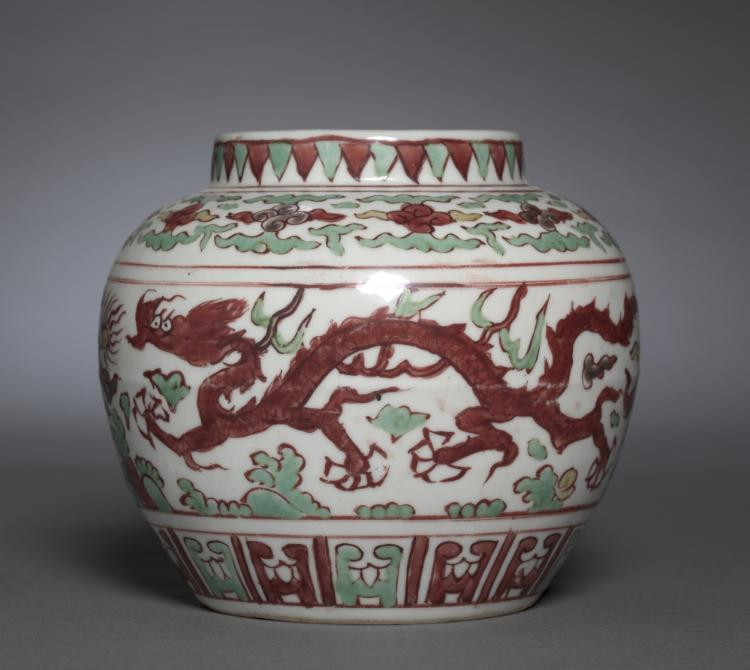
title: Jar with Dragons Pursuing Flaming Jewels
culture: China, Jiangxi province, Jingdezhen kilns, Ming dynasty (1368-1644), Jiajing mark and reign (1522-66)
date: 1522–66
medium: procelain with wucai (five color) overglaze enamel decoration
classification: Ceramic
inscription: 大明嘉靖年製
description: The exterior of this jar is ornamented with two rampant five-clawed dragons boldly drawn in rouge de fer. The dragons are in pursuit of the sacred jewel amid cloud scrolls in green and yellow, flanked at the top and bottom with broad registers of cloud scrolls and gadroons. The underfoot is glazed and bears a six-character nianhao in the form of a vertical mark reading "Daming Jiajing nianzhi," enclosed in double rings in underglaze cobalt blue.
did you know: The interior is glazed white porcelain.